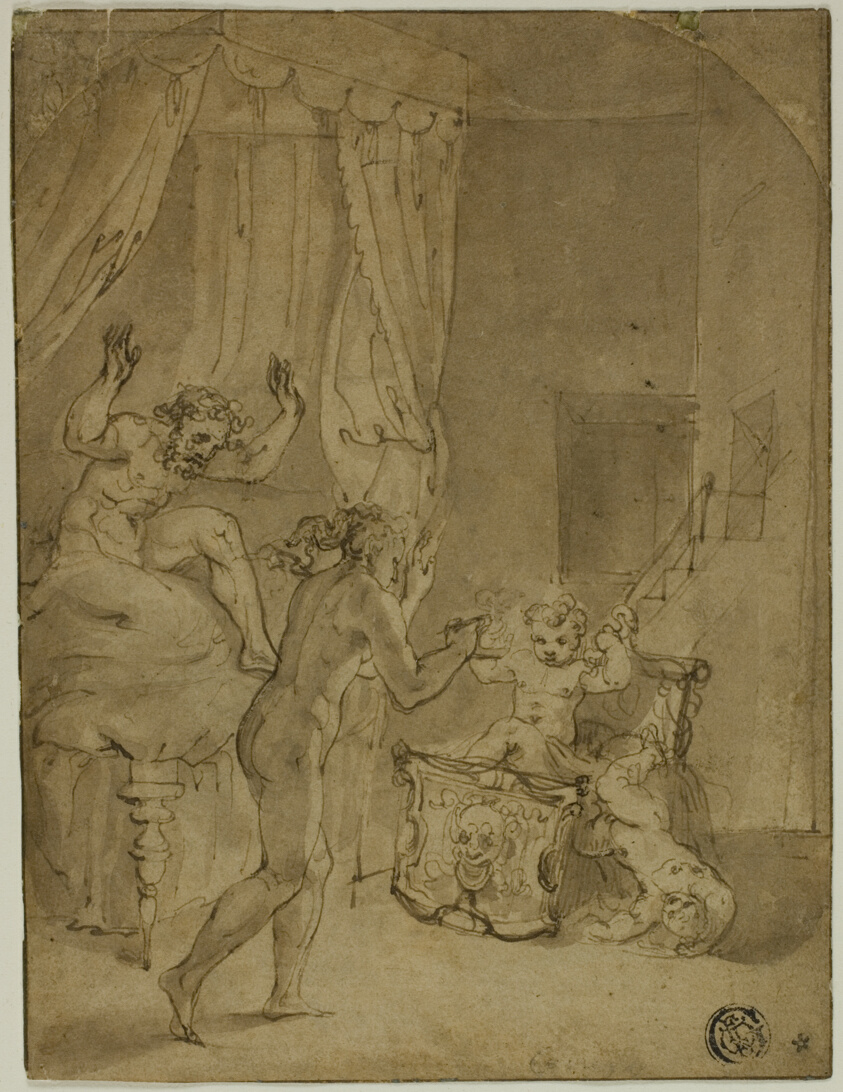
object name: Drawing and Watercolor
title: The Infant Hercules Strangling Serpents in His Cradle (recto); Crowned Woman Kneeling in Landscape, and Other Sketches (verso)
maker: Attributed to Prospero Fontana; Italian, 1512-1597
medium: Pen and brown ink with brush and brown wash (recto), and pen and brown ink (verso), on tan laid paper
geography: Italy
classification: ink with wash; drawings (visual works); prints and drawing